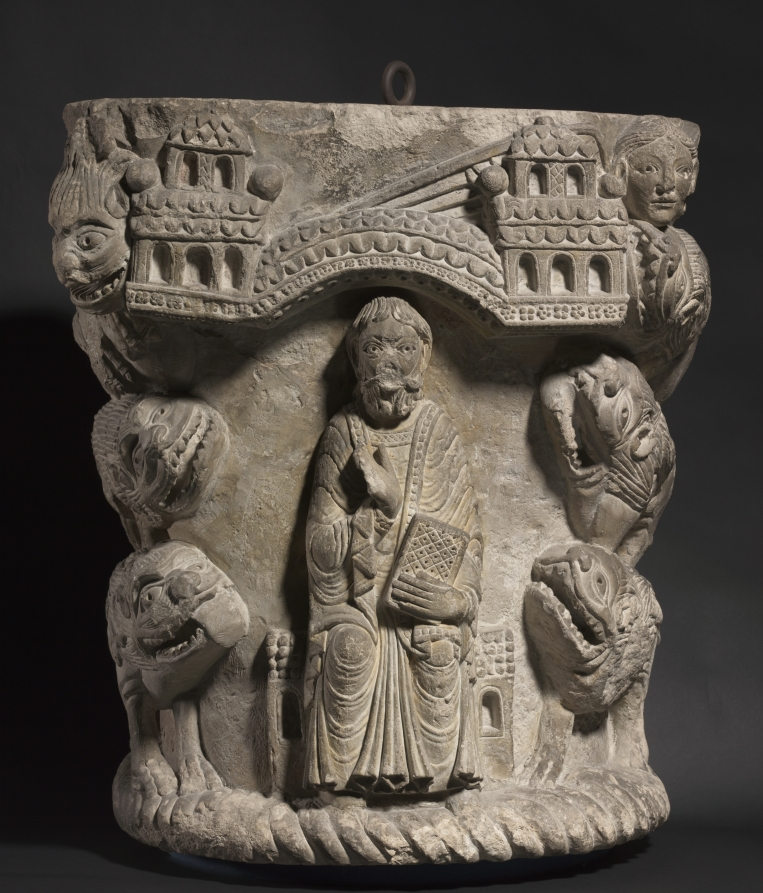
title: Daniel in the Lion's Den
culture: France, Saint-Aignan-sur-Cher, 12th century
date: c. 1125–50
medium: limestone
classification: Sculpture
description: According to the Old Testament, Daniel was cast into a lion’s den as punishment for his belief in a single god, but he was miraculously delivered from harm on account of his faith. This story is related here, with Daniel flanked by lions and the angel sent by God to save him. Together with other decorated capitals, this imposing work of Romanesque sculpture once decorated the interior of the church of Saint-Aignan-sur-Cher, a city in central France.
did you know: During the 12th century, churches used images to teach the faithful who were illiterate. While Daniel lived before Jesus, he is depicted holding a bible, alluding to the continuity between the Old and New Testaments.